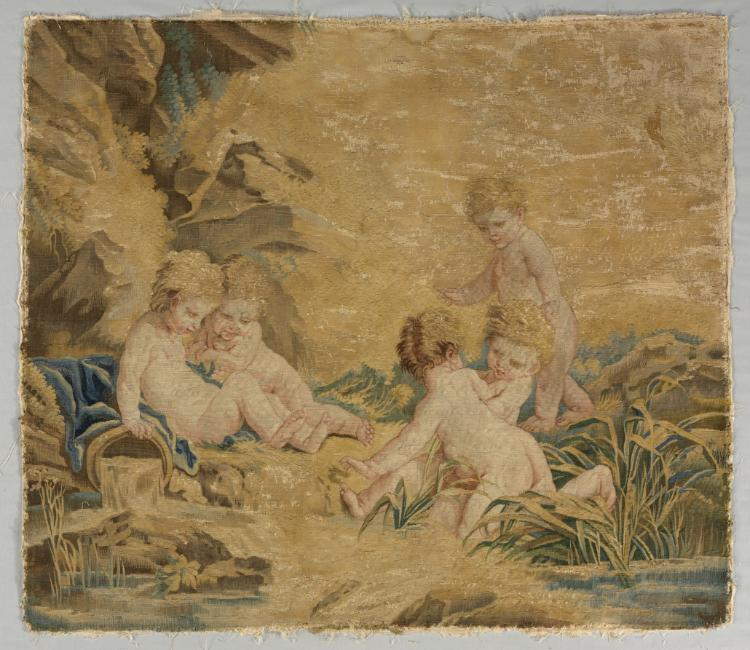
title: Children Playing: The Bath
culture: France, Beauvais, 18th century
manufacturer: workshop of Charron (French)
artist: after a design by François Boucher (French, 1703–1770)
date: 1700s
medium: tapestry weave: silk and wool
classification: Tapestry